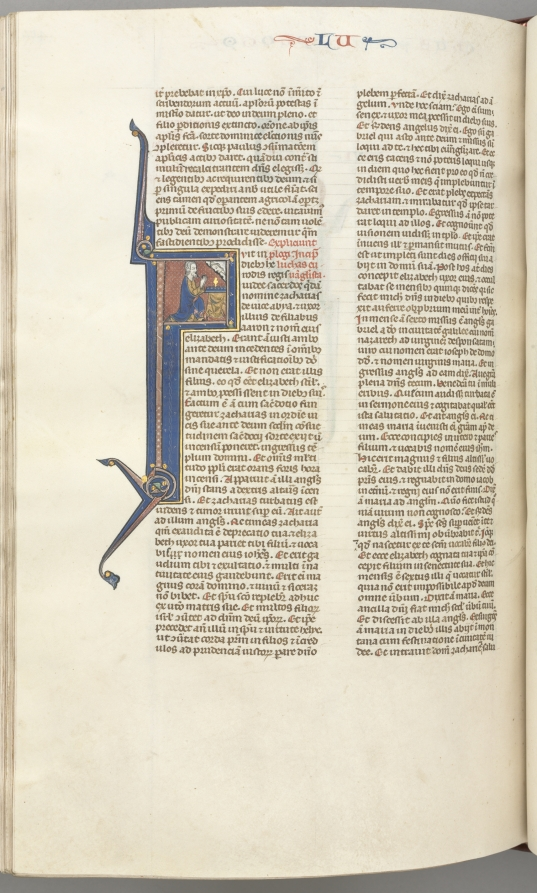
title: Fol. 412v, Luke, historiated initial F, Luke praying at an altar, bust of God above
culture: Southern France, Toulouse(?), 13th century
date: c. 1275–1300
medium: ink, tempera and gold on vellum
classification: Bound Volume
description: Biblical manuscripts were highly prized and important possessions of churches, monasteries, cathedral schools, and universities throughout medieval Europe. The biblical texts were known as the vulgate, the translations made by Saint Jerome in the fourth century from Hebrew and Greek into Latin, which became the definitive and official Latin version of the Roman Church. In the 13th century, the bible was, for the first time, produced as a single volume with an officially sanctioned sequence to its books and chapters as illustrated by this example. The very extensive decoration of this bible is arranged hierarchically to indicate the relative importance of the various texts so that full or almost full-page initials mark the openings of the first prologue, Genesis, and the first Gospel; historiated initials mark the beginning of each book and illuminated initials mark the Prologues.